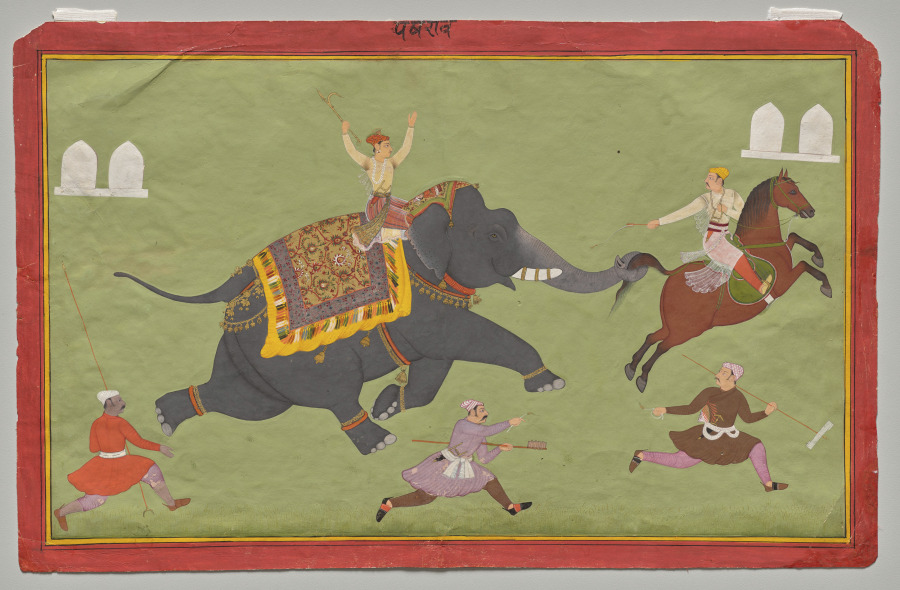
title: The Elephant of Maharana Jai Singh of Mewar (r. 1680–98) Catches a Horse by the Tail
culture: Northwestern India, Rajasthan, Rajput Kingdom of Mewar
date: c. 1680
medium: Gum tempera, ink, and gold on paper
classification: Painting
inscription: [[recto, upper center]] pakharāva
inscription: [[verso, center]] Māhārāṇājī śrī jaisīghjī rī vār ro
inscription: [[verso]] 253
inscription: [[verso]] Narṃ kī:7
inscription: [[verso, in red]] 13/253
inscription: [[verso, upper left corner]] nāṃ 2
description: The elephant driver holds his hands and the goad helplessly up in the air as the frenzied royal elephant grabs the tail of a galloping horse with its trunk. The horse rider turns around in astonishment and tries to whip the elephant’s trunk. A group of royal servants run erratically and try to contain the elephant.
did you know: The servant dressed in mauve jama (belted tunic) attempts to light a firecracker to frighten the elephant.